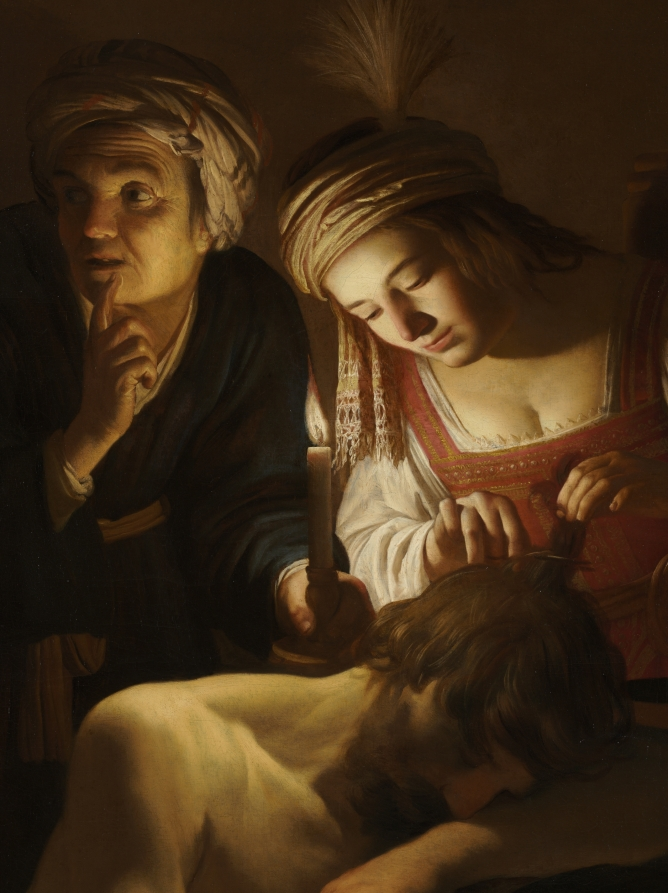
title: Samson and Delilah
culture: Netherlands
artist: Gerrit van Honthorst (Dutch, 1590–1656)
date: c. 1616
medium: oil on canvas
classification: Painting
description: In retaliation for Samson’s single-handed decimation of their army, the Philistines bribed his lover Delilah to discover the source of his strength: his hair, uncut since birth. Samson’s hair was shorn as he lay sleeping in Delilah’s lap, draining his strength and allowing the Philistines to capture him. Honthorst intensified the inherent drama of the scene by limiting his depiction to just three closely packed figures, starkly illuminated by a single candle. The old woman’s silencing gesture involves the viewer in the action, making us complicit in Delilah’s deceit.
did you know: Flickering candlelight and a nocturnal setting enhance the furtive nature of Delilah's actions.